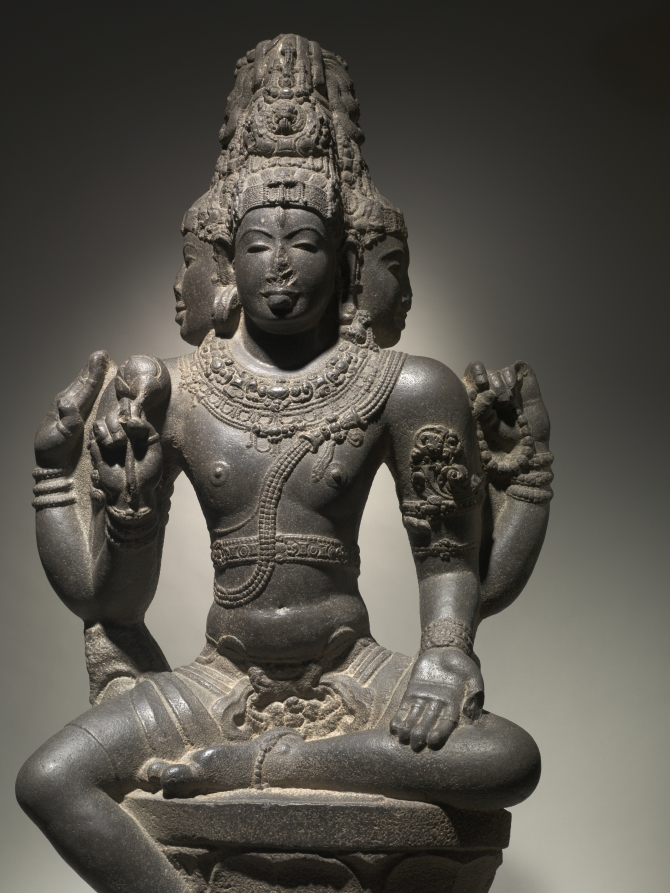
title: Brahma-Shiva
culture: South India, Tamil Nadu, Chola dynasty, late 10th - early 11th century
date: late 900s–1000s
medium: granite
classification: Sculpture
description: In the Hindu pantheon Brahma is in charge of carrying out the work of creation. In this tour-de-force of South Indian temple sculpture, he is in a special regal aspect, with the only elements of his typical priestly appearance being the prayer beads and the matted dreadlocks piled on his head. Four arms connote superhuman power, and four heads convey the idea that his creative activities spread in all four directions. His upper right hand enjoins freedom from fear, and the lower holds a lotus bud associated with birth and the process of creation. His lowered left hand is held in the gift-giving gesture, suggestive of the gift of creation he will bestow upon the world.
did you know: The back of the sculpture retains the original textured surface from a pointed chisel, suggesting it was in a niche or near a wall, protected from worshippers’ touches.